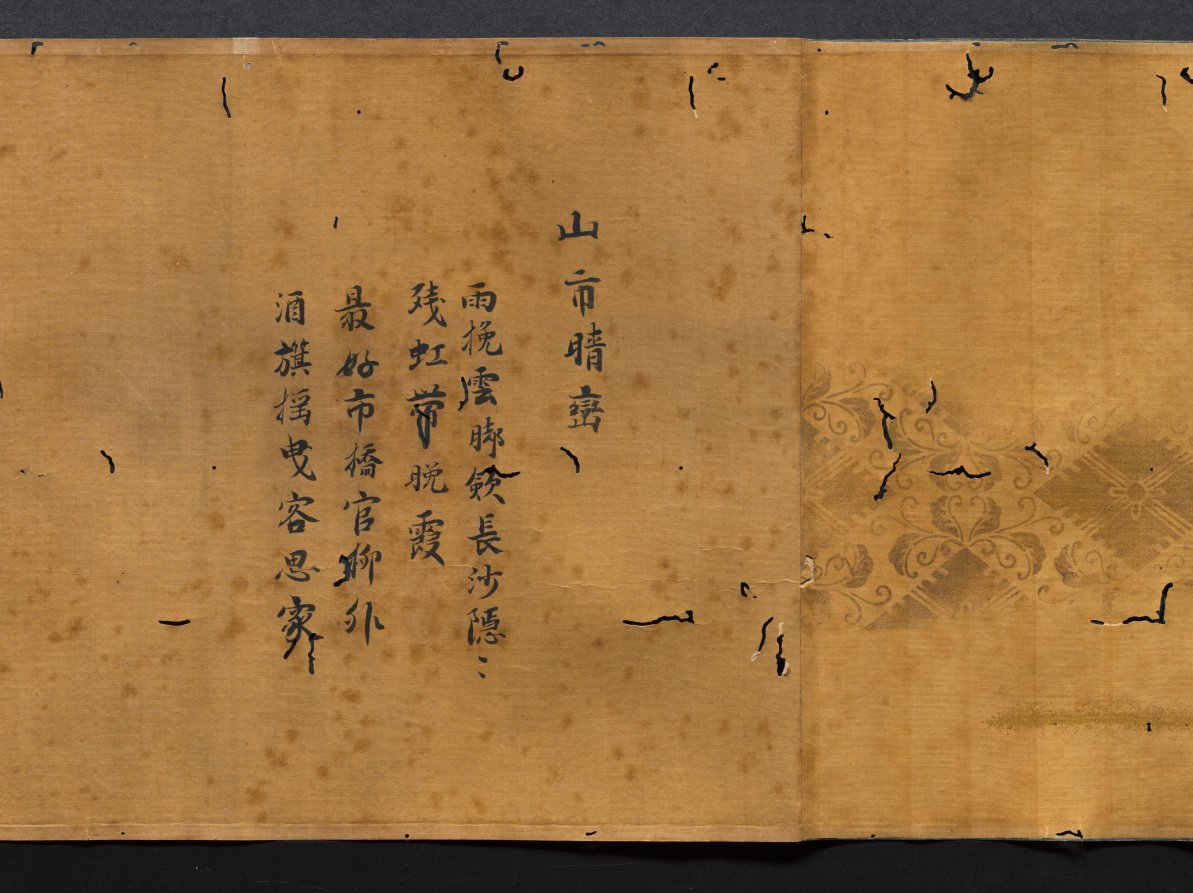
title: Eight Views of Xiao-Xiang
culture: Japan, Edo period (1615–1868)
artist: Kano Tan’yū (Japanese, 1602–1674)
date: 1615–1868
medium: handscroll; ink on silk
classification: Painting